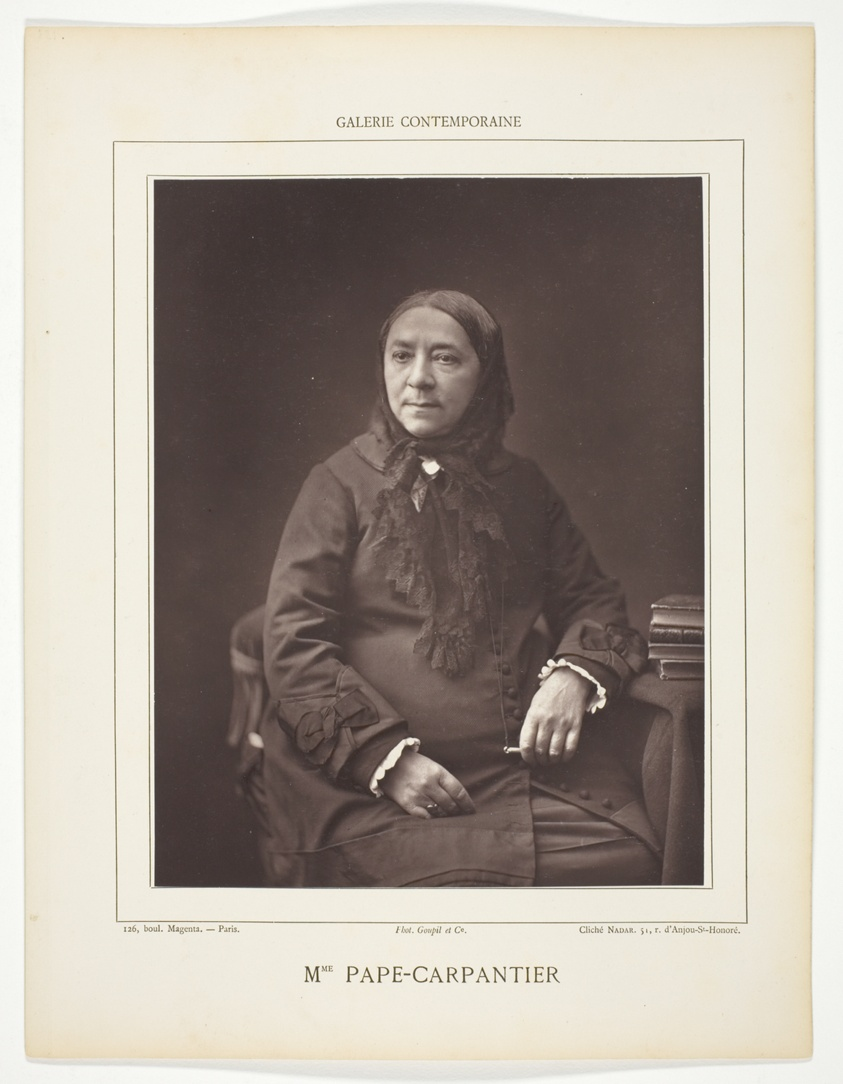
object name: Photograph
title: Mme. Pape-Carpantier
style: 19th century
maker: Nadar (Gaspard Félix Tournachon) (French, 1820–1910)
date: 1853/78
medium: Woodburytype, from the periodical “Galerie Contemporaine Littéraire, Artistique” (1878), volume 5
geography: France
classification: woodburytype; photomechanical process; photography; photograph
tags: Collected by Hugh Edwards, Contemporaine Littéraire